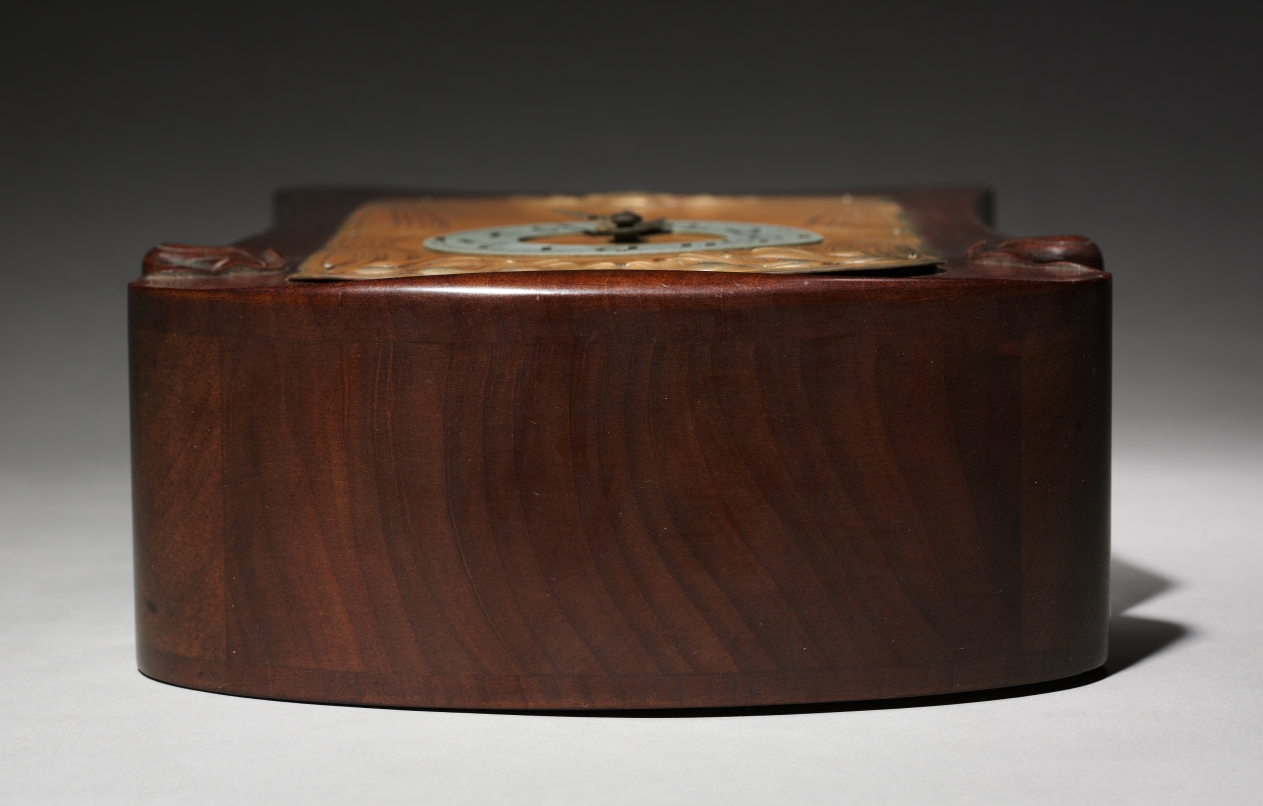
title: Mantle Clock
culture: America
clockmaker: Lenzkirch Clock Factory (German)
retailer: Tiffany & Co. (America, New York, est. 1837)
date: 1901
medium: brass, mahogany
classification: Wood